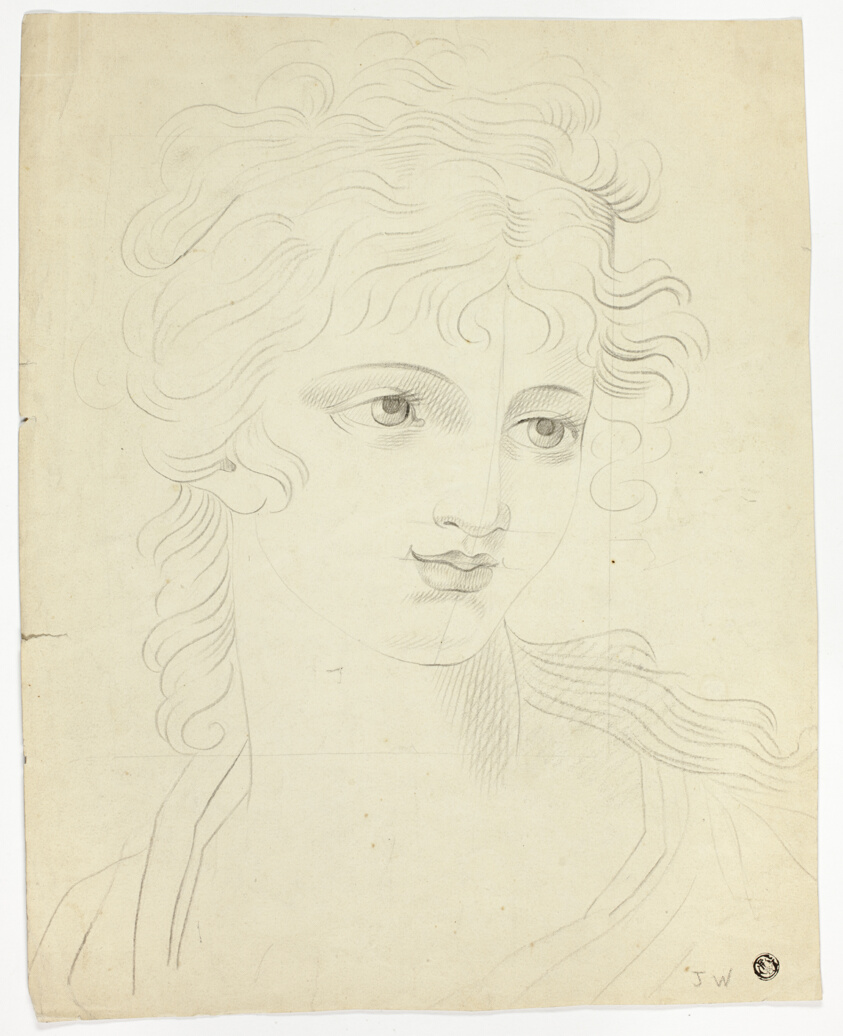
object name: Drawing and Watercolor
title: Portrait Head of Girl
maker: J. Aspinall (English, active 1790-1800)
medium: Black crayon, with graphite, on cream wove paper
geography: England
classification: graphite; drawings (visual works); prints and drawing